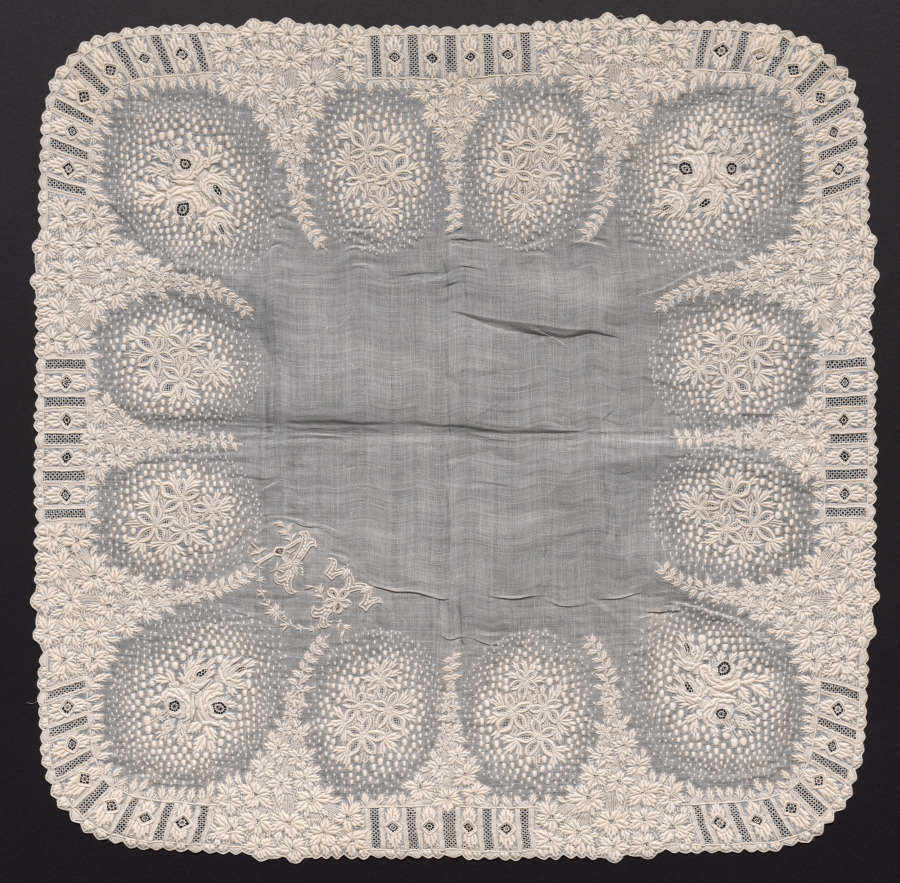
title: Handkerchief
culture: France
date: 1800–1820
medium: Plain weave linen center: white linen embroidery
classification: Embroidery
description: The initials A. T. are embroidered in one corner of this handkerchief.